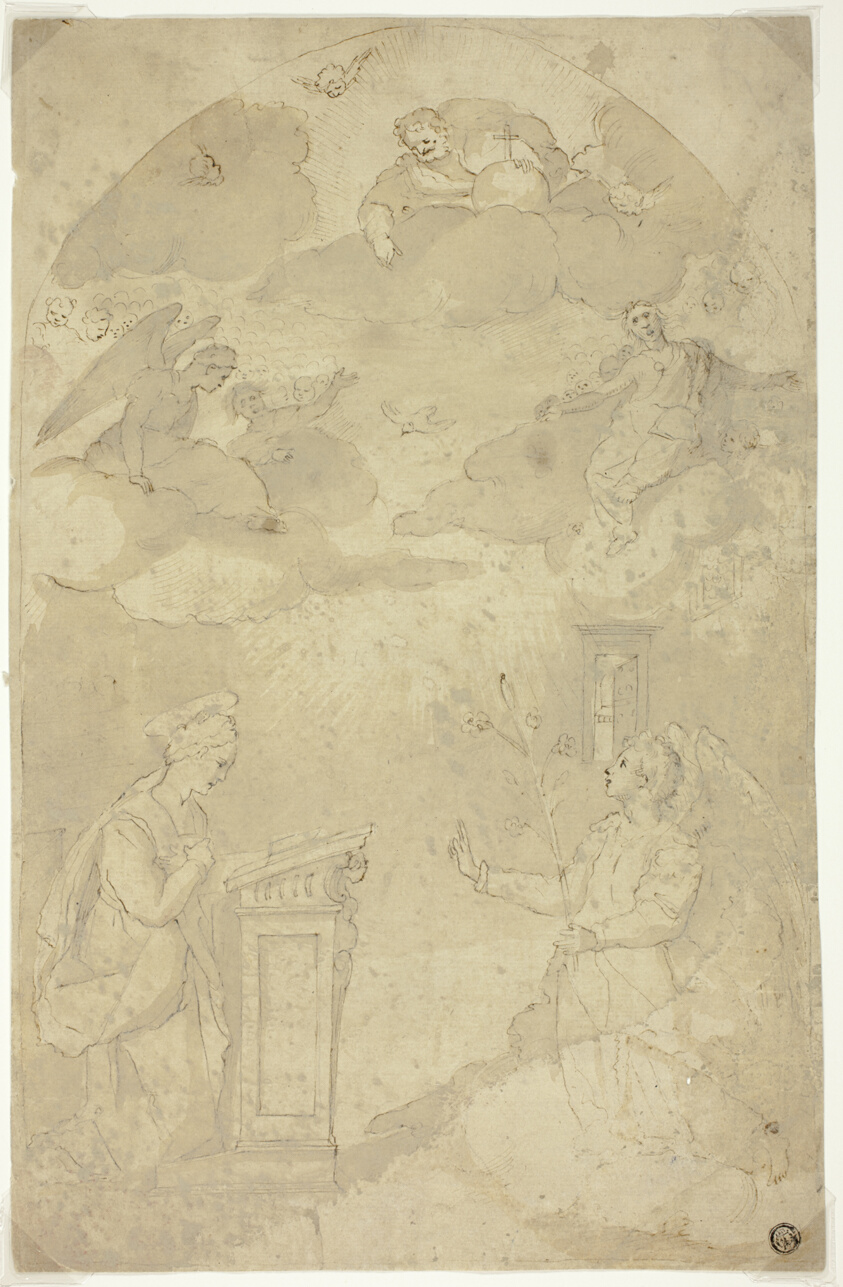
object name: Drawing and Watercolor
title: Annunciation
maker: After Andrea Boscoli; Italian, c. 1560-1608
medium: Pen and brown ink, with brush and brown wash and traces of graphite, on cream laid paper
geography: Italy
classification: ink with wash; drawings (visual works); prints and drawing